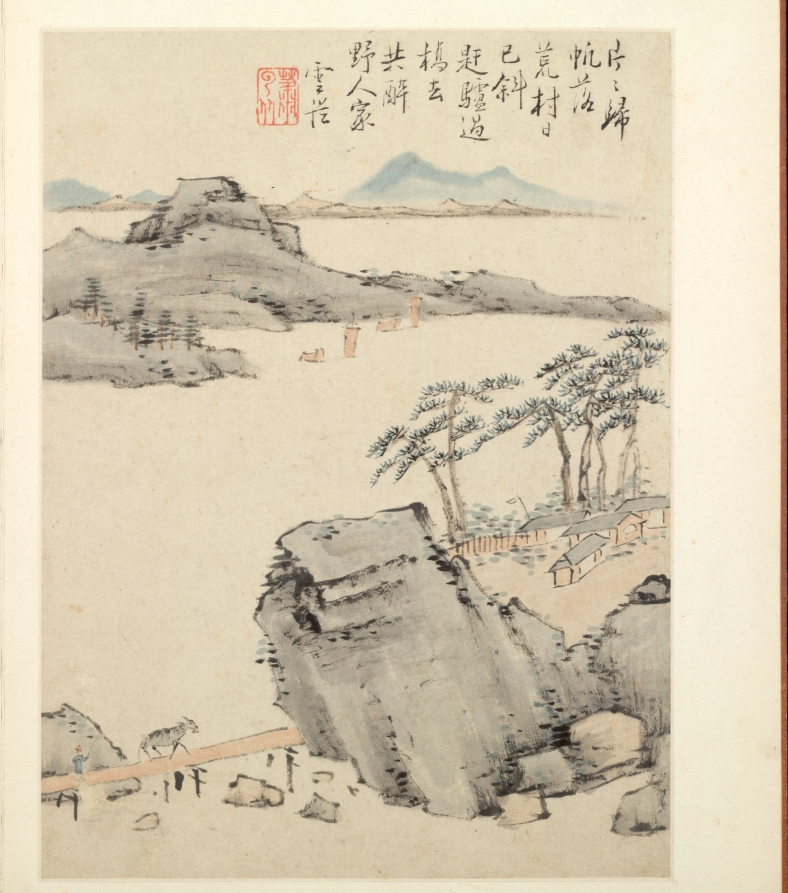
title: Album of Seasonal Landscapes, Leaf C (previous leaf 6)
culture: China, Qing dynasty (1644-1911)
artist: Xiao Yuncong (Chinese, 1596–1673)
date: 1668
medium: album leaf; ink and light color on paper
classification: Painting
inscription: Artist's inscription, signature, and 8 seals: Leaf F. Bit by bit, returning sails are lowered;/ In the deserted village the sun begins to set./ I lead my donkey across a bridge,/ I'll get drunk with friends at a country house. Yuncong [seal] Xiao Yuncong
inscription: 9 additional seals: 2 of Chen Yixi 陳奕禧 (1646-1709); 4 of Li Yufen 李玉棻 [Li Yunhu 李韵湖] (active mid-1800s); 3 unidentified.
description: Throughout his lifetime, Xiao Yuncong visited Nanjing and Yangzhou, cities embedded in the fertile and water-rich Jiangnan region, as reflected in his paintings. Xiao painted from nature, and his landscapes are informed by the seasons and his travels, as well as by his experience as a print designer. Xiao’s fresh, light colors continue to appear in later Shanghai school paintings. This album was formerly in the collection of Li Yufen in Yangzhou and then owned by Wu Hufan in Shanghai. While the artist impressed his seal consistently below his poetic inscriptions in the upper parts of the composition, the red seals on the margins and in the lower corners of the paintings are impressions by the album’s previous owners.